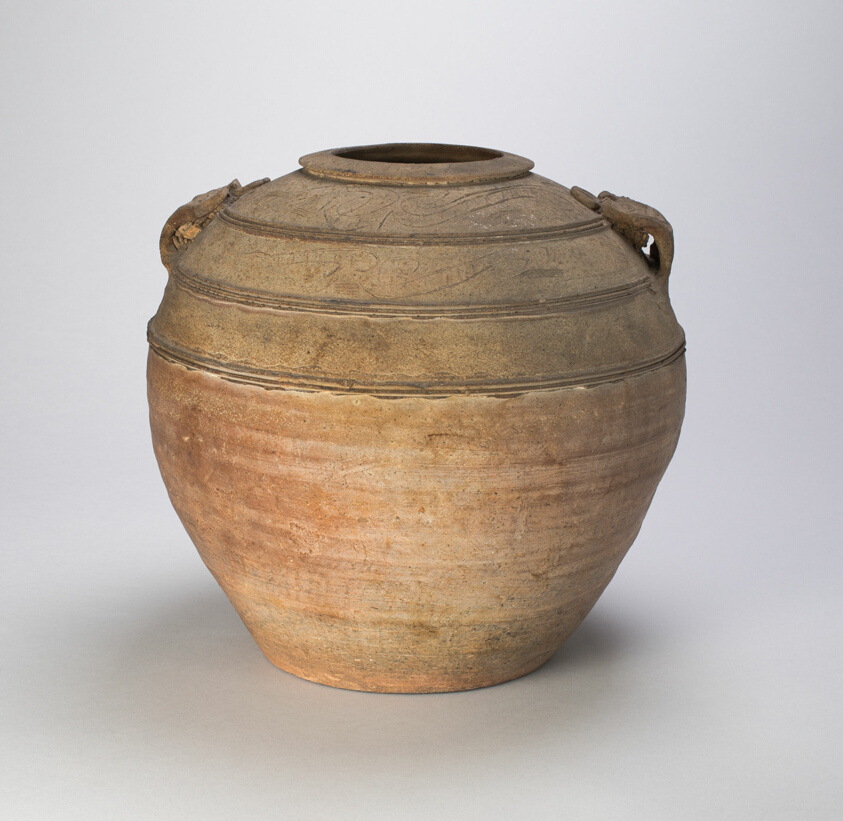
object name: Vessel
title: Globular Jar with Relief Cordons and Two Handles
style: Chinese (culture or style)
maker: China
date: Western Han dynasty (206 B.C.–A.D. 9), 1st century B.C.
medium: Stoneware with underglaze incised decoration and ash glaze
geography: China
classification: stoneware; asian art; ceramics; vessel